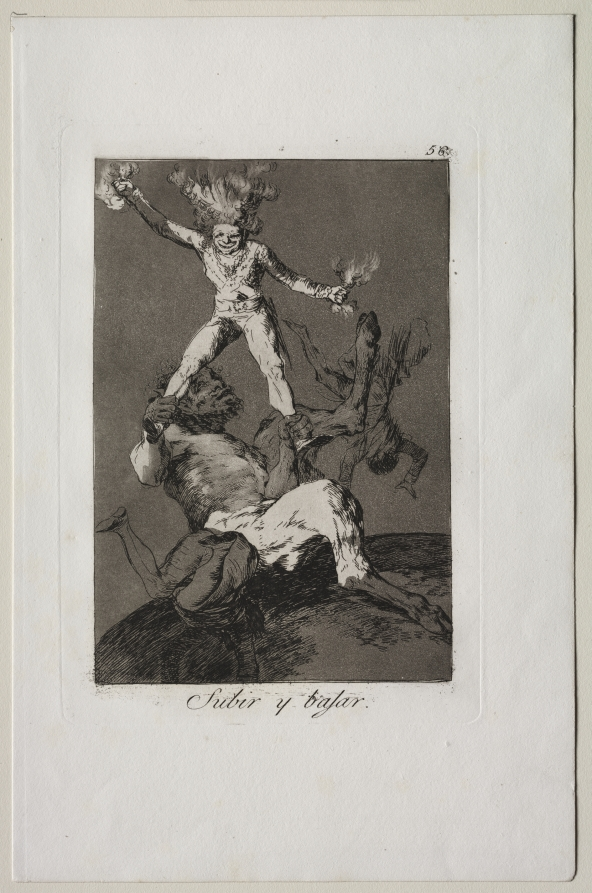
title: To Rise and to Fall, Plate 56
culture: Spain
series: Los Caprichos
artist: Francisco de Goya (Spanish, 1746–1828)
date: 1799 (printed c. 1855)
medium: etching and aquatint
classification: Print